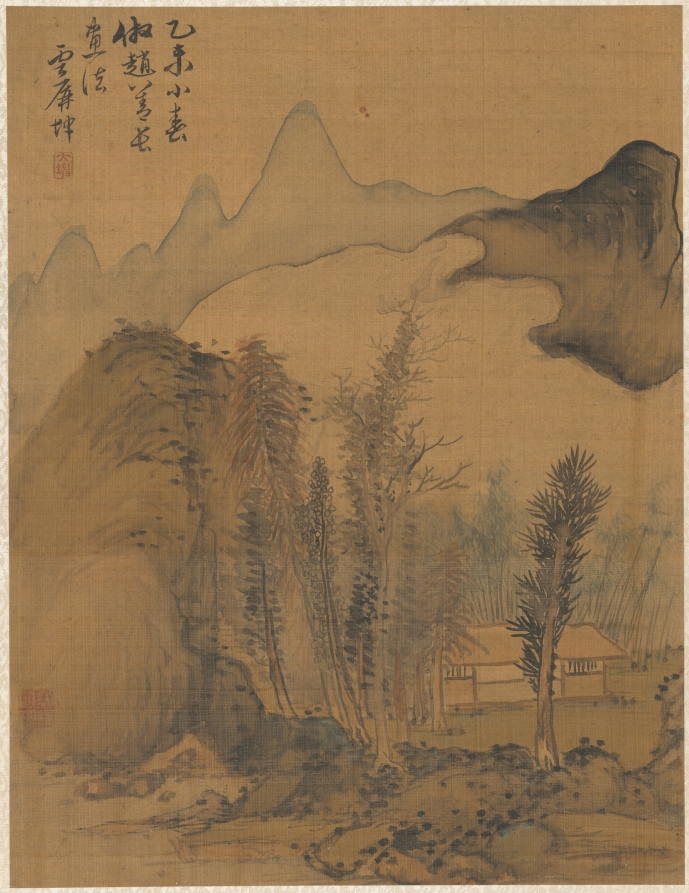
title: Landscape in the Style of Chao Yuan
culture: China, Qing dynasty (1644-1911)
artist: Zhai Dakun (Chinese, d. 1804)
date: 1775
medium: album leaf; ink and color on silk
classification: Painting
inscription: Hut Amidst Trees In the tenth lunar month (xiao chun) of the year yiwei (1775), in the manner of Zhao Shanzhang (Zhao Yuan; 14th Century) Yunping Kun. Seal: r/r: "Dakun"